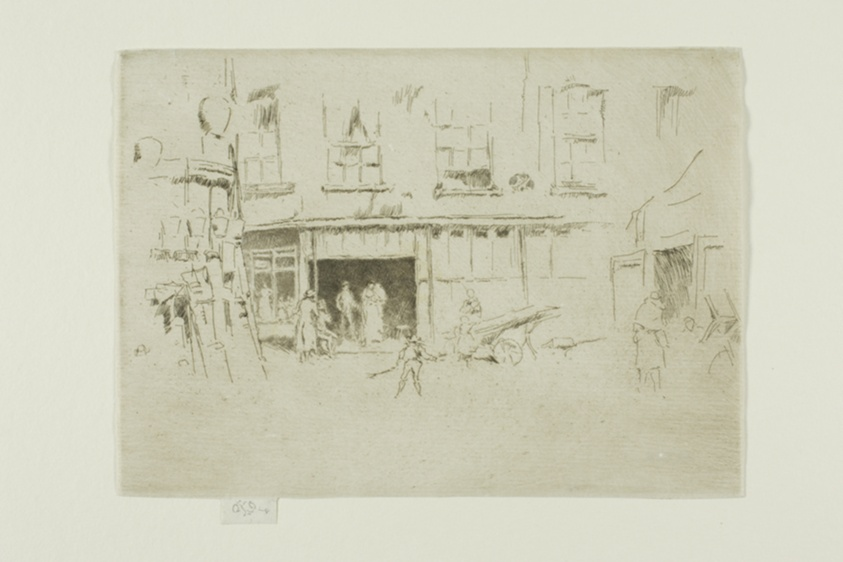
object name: Print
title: Little Court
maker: James McNeill Whistler (American, 1834-1903)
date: 1880/81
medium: Etching with foul biting in black ink on ivory laid paper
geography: United States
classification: etching; foul biting; print; prints and drawing; paper